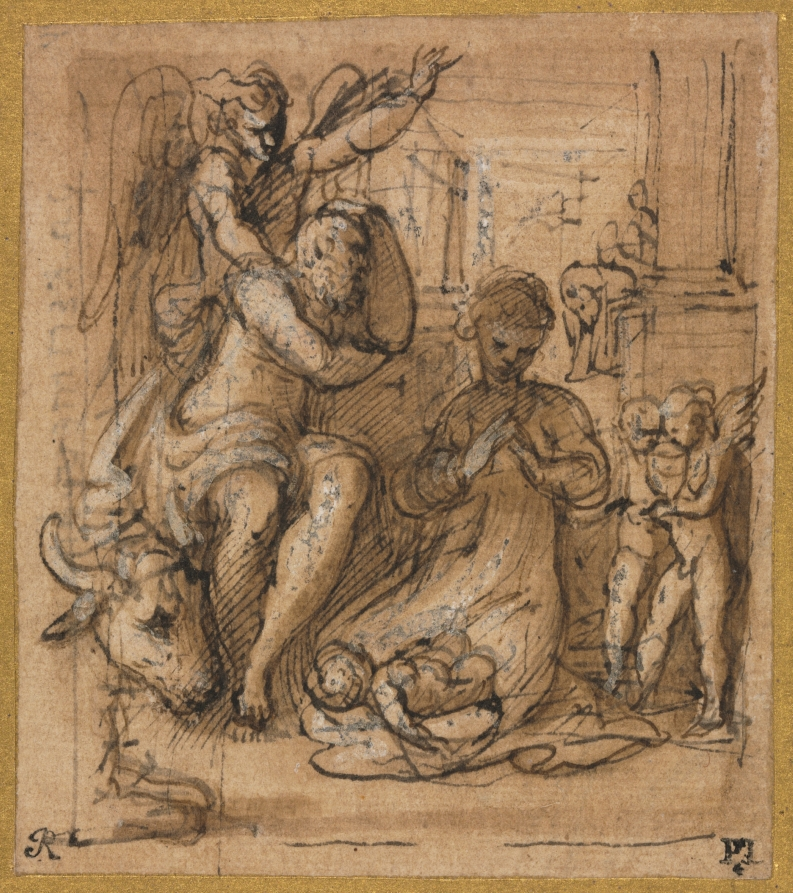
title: The Nativity with the Dream of Joseph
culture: Italy, 16th century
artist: Parmigianino (Italian, 1503–1540)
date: c. 1527/30?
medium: pen and brown and black ink and brush and brown wash, with traces of brush and black wash, heightened with lead white (oxidized)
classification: Drawing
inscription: RECTO OF SECONDARY SUPPORT, lower left, in graphite: 19 ; lower center, in brown ink: Parmeggiano. ; lower right, in graphite: 15 ; VERSO OF SECONDARY SUPPORT, lower center, in graphite: A 3541 ; FRAGMENT OF OLD MOUNT (now removed), across top, in graphite: Collns. Peter Lely (1618-1680) Lugt 2092 / J. Richardson Sr. (1665-1740) Lugt 2169. ; lower left, in graphite: Parmeggiano: The Nativity. ; across bottom, in graphite: (& Dream of joseph .. An[q?]u Waru[?]q / [lo?] [flu?] in [6?] [illegible] )